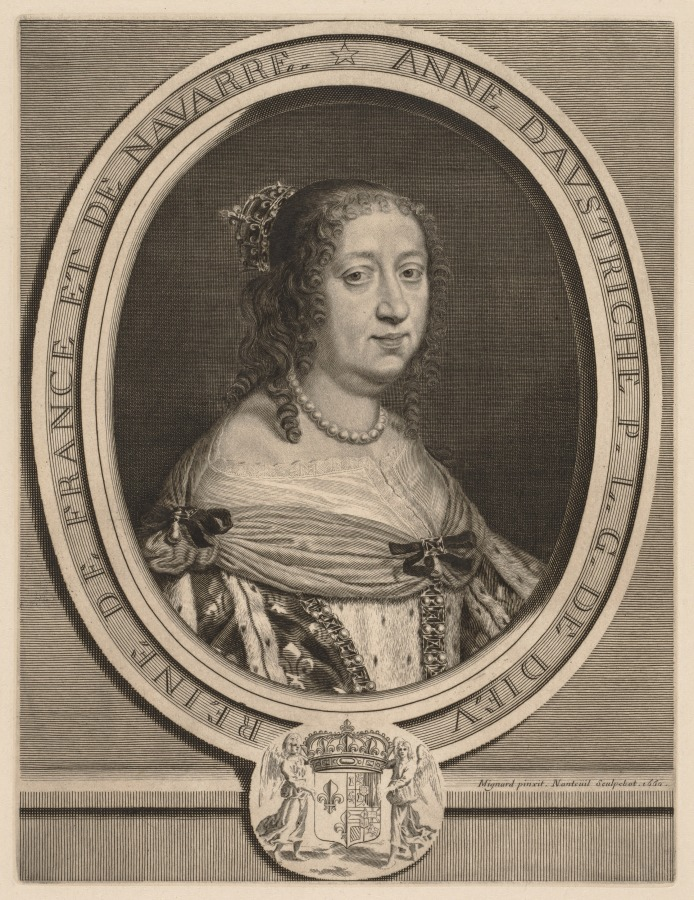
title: Anne of Austria, Queen of France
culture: France, 17th century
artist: Robert Nanteuil (French, 1623–1678)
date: 1660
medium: engraving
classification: Print